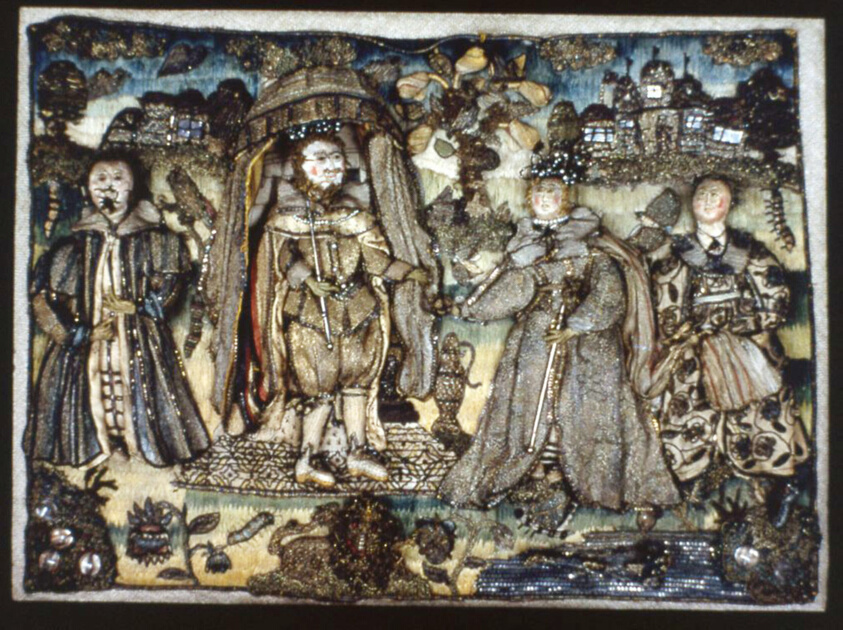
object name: Textile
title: Picture Depicting the Queen of Sheba before King Solomon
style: 17th Century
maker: England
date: 1601/50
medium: Silk, warp-float faced 7:1 satin weave; appliquéd with silk, warp-float faced 7:1 satin and plain weaves; painted; embroidered with silk, silk 2:2 twill oblique interlaced tapes, gilt- and silvered-metal-strip-wrapped silk, and gilt- and silvered-metal strips, coils, wires and paillettes in satin, single satin, raised stem and a variety of buttonhole stitches; laid work and couching; feathers; glass beads and seed pearls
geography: England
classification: needlework (visual works); textile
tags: portraits: multiple subjects, crowns, Christian subjects, dresses, clouds, insects, flowers, buildings, birds, lions, king, queens